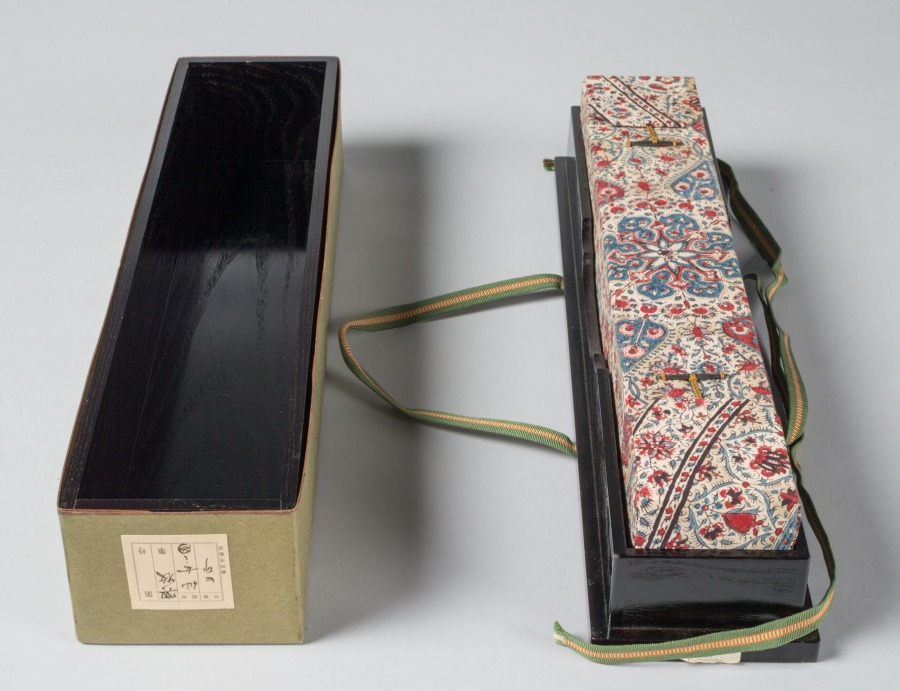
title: Female Daoist Figure in Landscape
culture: Japan, Muromachi period (1392–1573)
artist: Kōboku (Japanese)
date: early 1500s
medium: hanging scroll; ink on paper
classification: Painting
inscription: 「興牧」（朱文方印）